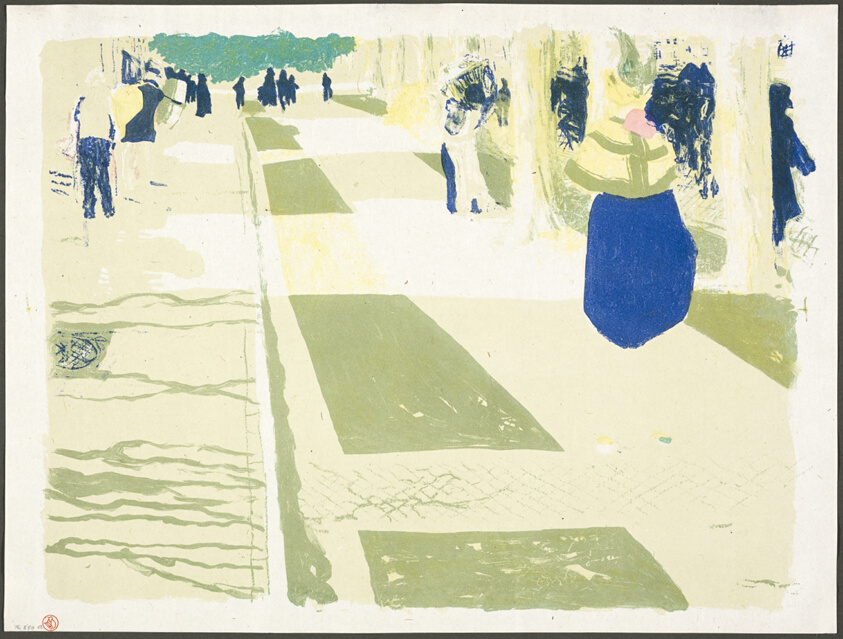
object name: Print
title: The Avenue, plate two from Landscapes and Interiors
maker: Edouard Vuillard (French, 1868-1940); printed by Auguste Clot (French, 1858-1936); published by Ambroise Vollard (French, 1867-1939)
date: 1899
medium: Color lithograph on grayish-ivory China paper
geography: France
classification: lithograph; print; prints and drawing